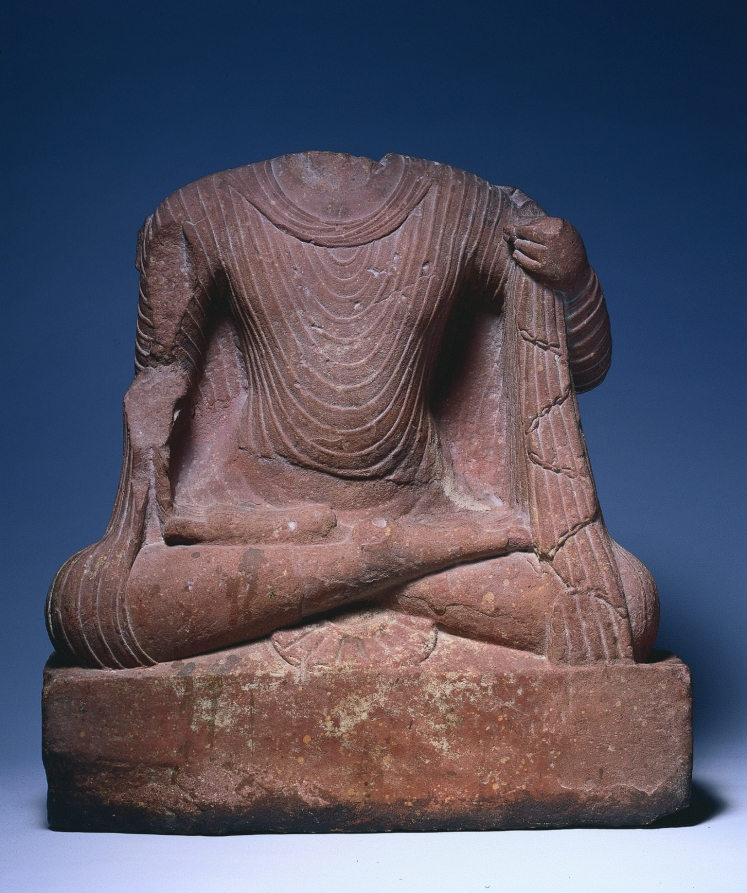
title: Seated Buddha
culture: Northern India, Mathura, Kushan period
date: 200s CE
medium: sandstone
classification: Sculpture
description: Artists in the north Indian city of Mathura reinterpreted the appearance of the Greco-Roman style of drapery, which was popular in the region of Gandhara, in present-day Pakistan. They preferred a more otherworldly, abstracted rendition of the folds, giving the Buddha a powerful, superhuman energy.